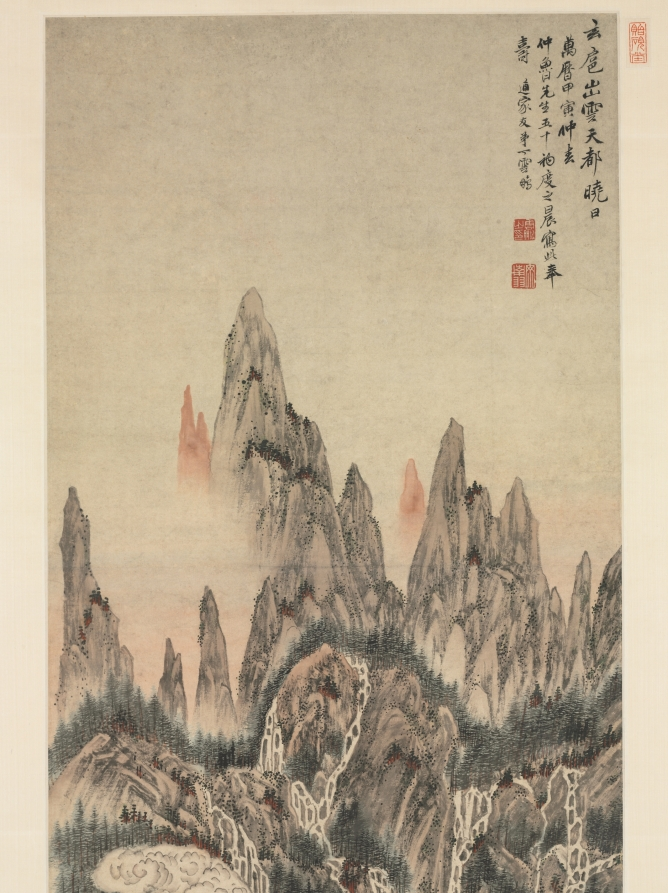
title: Morning Sun over Heavenly Citadel Peak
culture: China, Ming dynasty (1368–1644)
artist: Ding Yunpeng (Chinese, 1547-c. 1628)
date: 1614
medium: Hanging scroll; ink and light color on paper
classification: Painting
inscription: Artist's inscription, signature, and 2 seals: Clouds arise from the dale of the "Dark Plateau," The morning sun is over the peak of the Heavenly Citadel. In mid-spring of the chia-yen year of the Wan-li era [1614], painted as a fiftieth birthday present to Mr. Chung-lu. Junior Friend of Family Alliance, Ting Yün-p'eng [seals] Yün-p'eng chih yin; Ting Nan-yü.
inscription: 10 additional seals: 5 of Kao Hsiang-ling (dates unknown); 5 unidentified.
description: A birthday gift, this scroll by Ding Yunpeng from Anhui is among the earliest paintings of Mount Huang (Yellow Mountains), here depicting Heavenly Citadel Peak. The mountains are named after the legendary Yellow emperor who is said to have visited the place to look for the essence of immortality. Deep red strokes accentuate vegetation and allude to cinnabar, the alleged elixir of immortality. Difficult to climb and access, Mount Huang in Anhui province did not become a destination for hikers nor a subject for artists before the late Ming dynasty, when steps were built. Today its towering peaks are a national site and tourist attraction.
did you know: Mount Huang, known for its scenic beauty, is one of China's major tourist attractions.